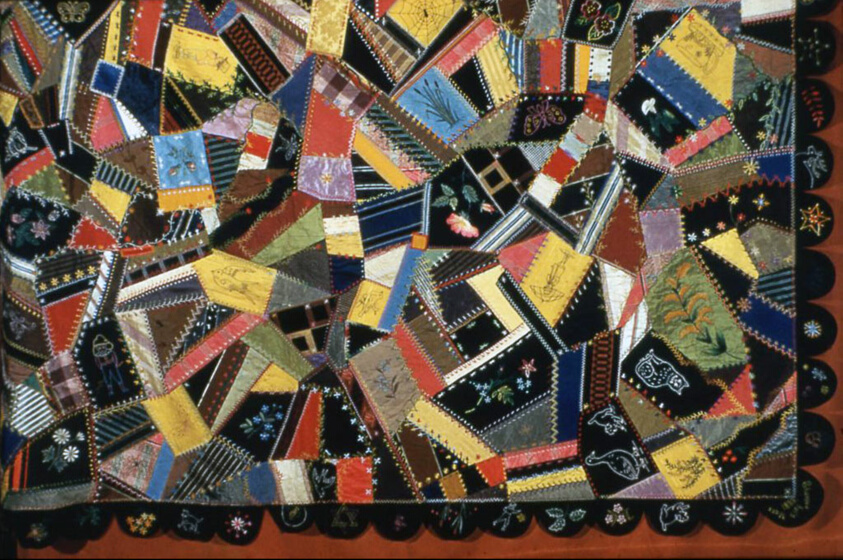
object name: Textile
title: Bedcover (Crazy Quilt)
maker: United States, Massachusetts, Chicopee Falls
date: 1887/88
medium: Silk, in a variety of weaves including cut velvet weave and a variety of techniques; pieced; embroidered in silk and chenille threads in a variety of stitches; backed with silk, satin weave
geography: Massachusetts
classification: textile; needlework - quilt